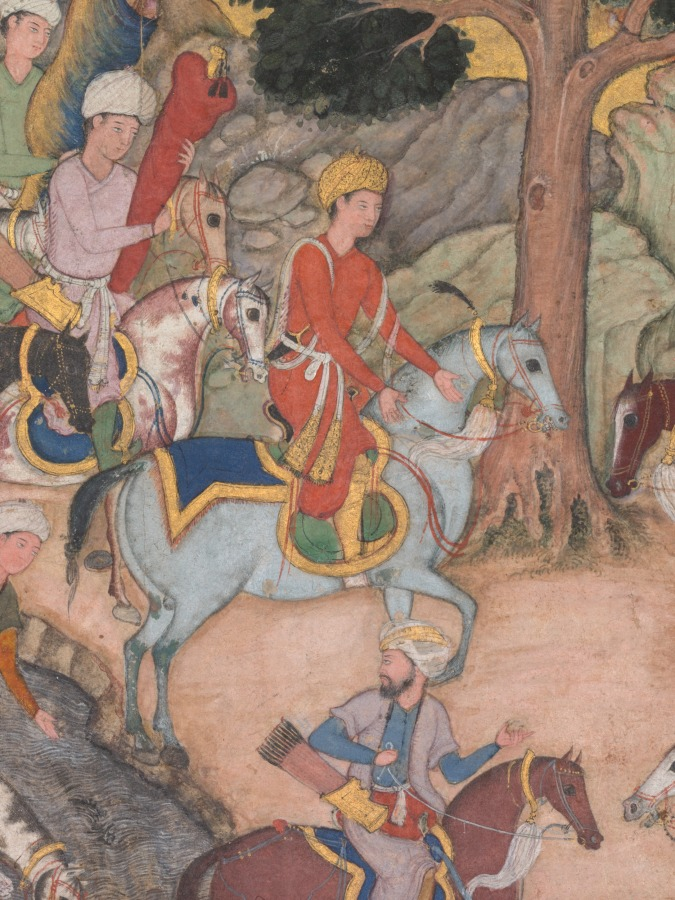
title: Babur meeting with Sultan Ali Mirza at the Kohik River, from a Babur-nama (Memoirs of Babur)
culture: India, Mughal school, 16th century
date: c. 1590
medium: Gum tempera and gold on paper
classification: Painting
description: Thirty years before he captured Delhi and founded the Mughal Empire, Babur began his expansionist activities at the age of 13, as depicted in this painting of an encounter that took place in 1496. Having traveled long distances across harsh dry terrain, Babur confronted one of his rivals who, like him, was angling to march on and conquer the illustrious city of Samarkand, the former capital of his ancestor Timur.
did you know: Camels carry collapsed tents to be pitched for nightly encampments and parties.